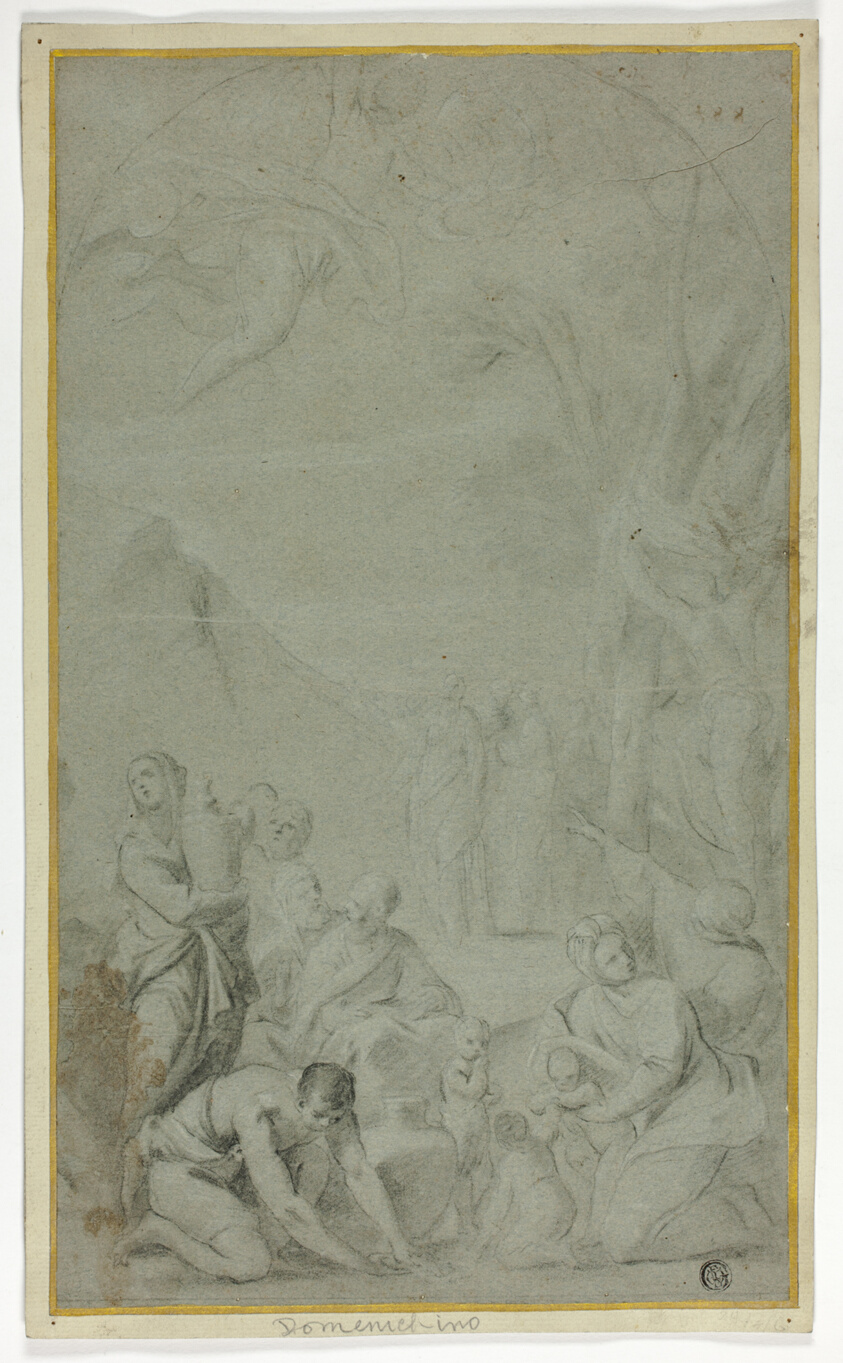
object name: Drawing and Watercolor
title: Israelites Gathering Manna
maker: Follower of Francesco Monti; Italian, 1646-1712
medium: Charcoal with stumping, heightened with white chalk, on blue laid paper, laid down on ivory laid card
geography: Italy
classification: charcoal; drawings (visual works); prints and drawing